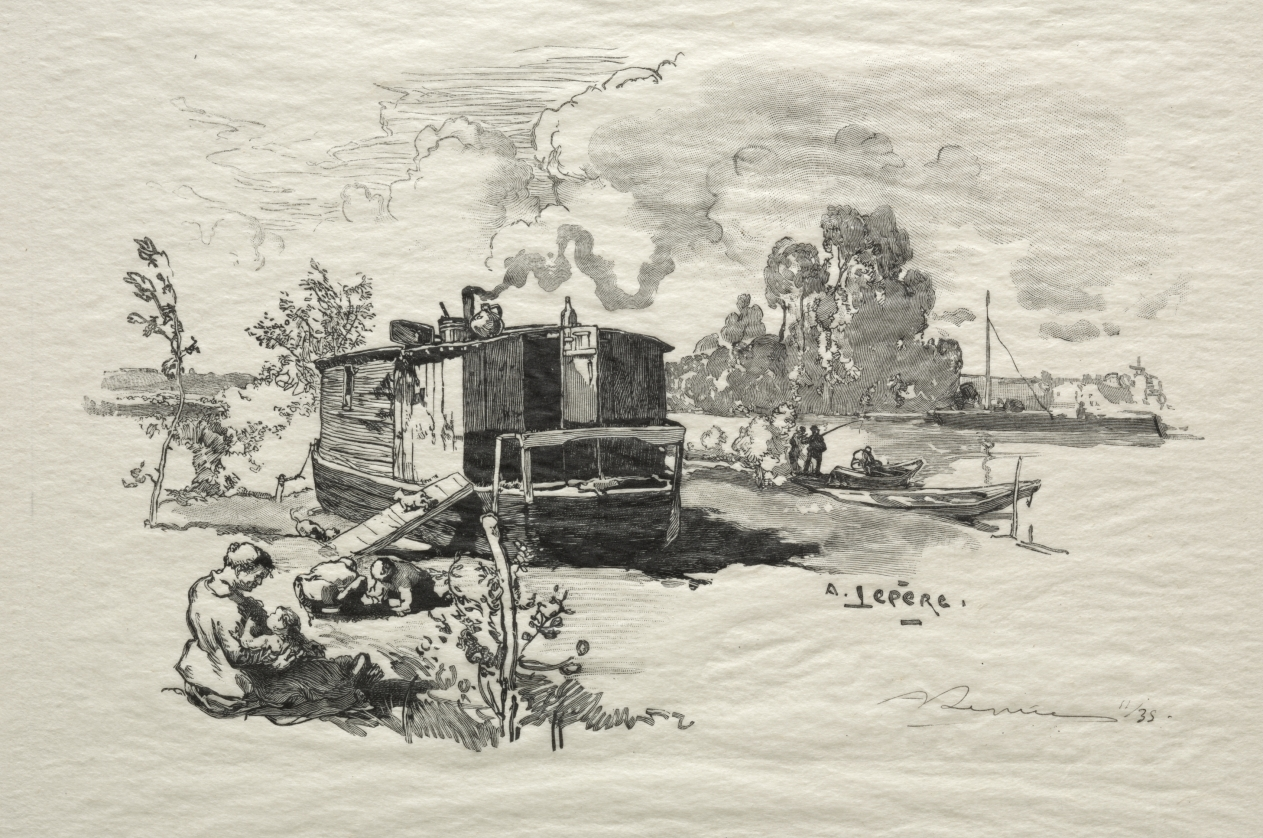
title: Bateau logement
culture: France, 19th-20th century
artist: Auguste Louis Lepère (French, 1849–1918)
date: c. 1870–1918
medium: wood engraving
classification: Print